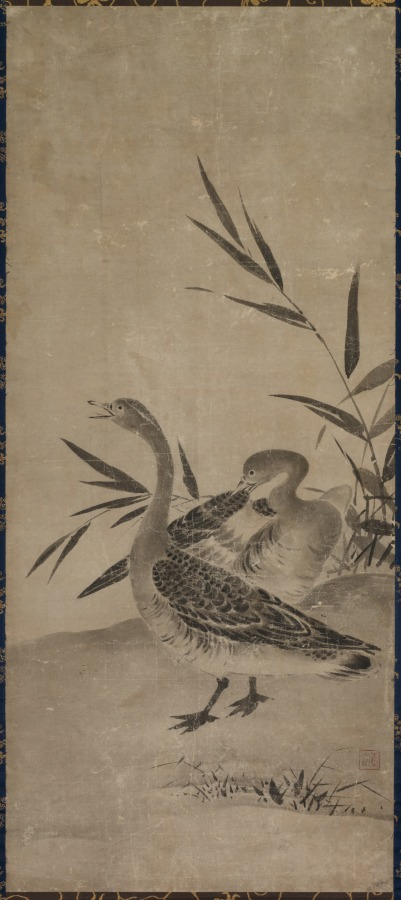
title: Geese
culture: Japan, Edo period (1615–1868)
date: early 1600s to mid-1800s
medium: hanging scroll; ink on paper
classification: Painting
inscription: 「真相」の朱文方印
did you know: This artist is emulating the style of Sōami (d. 1525). A seal on the painting even has one of Sōami's names.